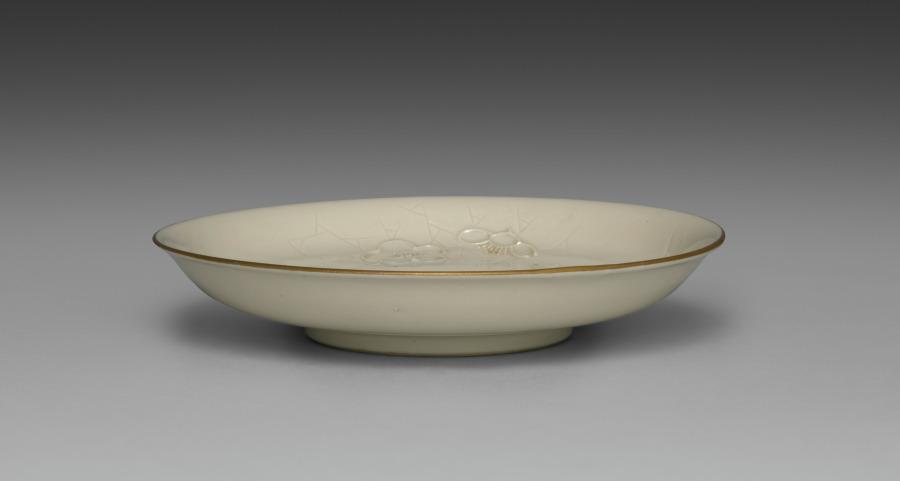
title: Medium-sized Dish from Dining Set with Plum Blossoms and Cracked-Ice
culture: Japan, Meiji period (1868–1912)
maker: Seifū Yohei II (Japanese, 1844–1878)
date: c. 1875–78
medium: Porcelain with molded designs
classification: Ceramic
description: Each item in this set has a delicate low-relief design of flowering plum branches over scattered, intersecting lines meant to resemble the cracked-ice surface of a frozen body of water and is signed on the base in gold pigment. While Yohei II produced many fine works in underglaze blue, like those produced by Kiyomizu Shichibei, he also made works in quite different styles later in his career, from the early 1870 s. In 1873, he was appointed purveyor to the Industrial Center of Kyoto Prefecture, a designation associated with Kyoto’s efforts to reach an international market through the port of Kobe; and from 1875 until his death, he was involved in national-level projects to present Japanese ceramics across the world. It was during this period that Yohei III was apprenticed to Yohei II, and it has been suggested that this set may in fact be an early example of Yohei III’s work, which he signed with his teacher’s name. Decorated with flowers resembling Japanese textile motifs, the set calls to mind the design of Yohei II’s pair of vases with plum blossoms in the Victoria and Albert Museum. Here, the elaborate trees created for a formal public exhibition setting have been translated into the approachable blossoms of the genteel domestic environment. While the designs are consistent across the pieces, each raised flower petal and pistil and each incised line in the ice was done by hand, so the cups, bowls, and dishes are similar yet unique. The bottoms of two boxes once identified the set’s owner, but the information has been deliberately obscured with black ink. However, inscriptions still visible appear to indicate two occasions, once at the end of July 1886 , and once again in June 1916 , when parts of the set were requested from Hokura in Niigata Prefecture. The location corresponds to a neighborhood in the present-day city of Jōetsu. The surname Tsuji 辻 also appears on a paper tag affixed to one of the box cloths. Future research may possibly reveal more about their provenance. A vase by Yohei III in a private collection combines the formal grandeur of the Yohei II vases in the Victoria and Albert Museum with the gentler design of this dining set, placing flowering plum trees against soft, scalloped-edge clouds resembling those in golden screens.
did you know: The dining wares have a creamy white coloration that the four boxes containing them identify as Korean in style.